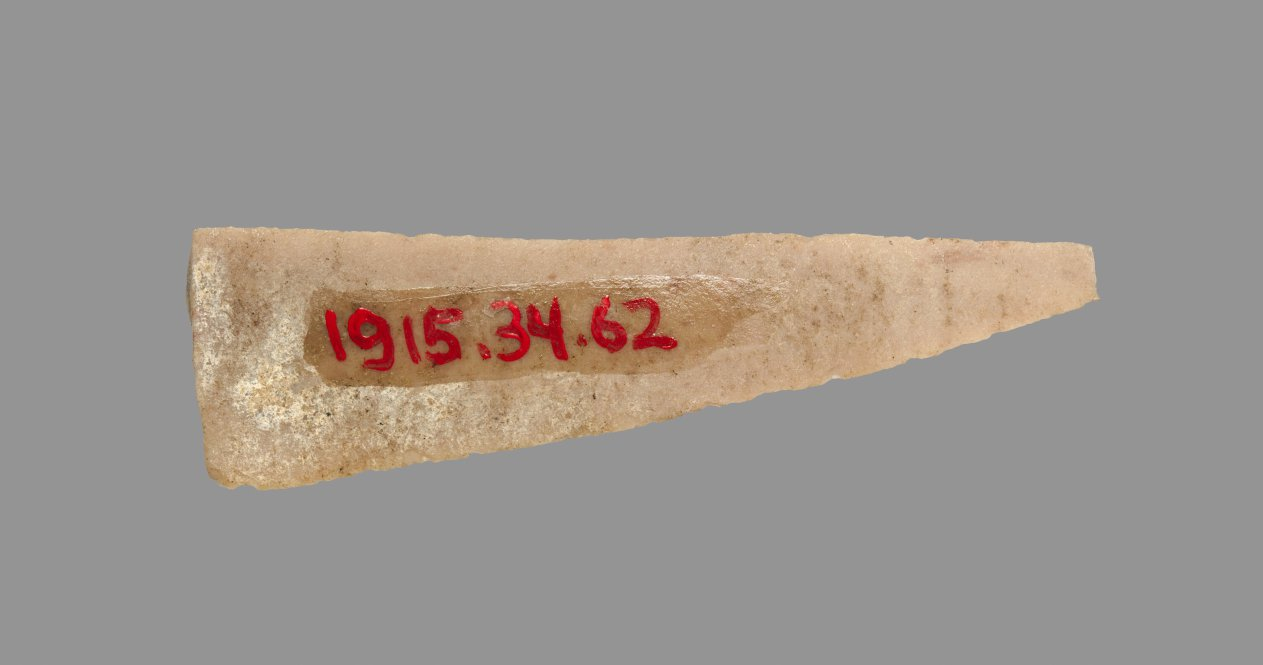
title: Sickle Blade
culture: Egypt, Middle Kingdom (2040–1648 BCE), Dynasty 12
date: 1980–1801 BCE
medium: flint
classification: Implements